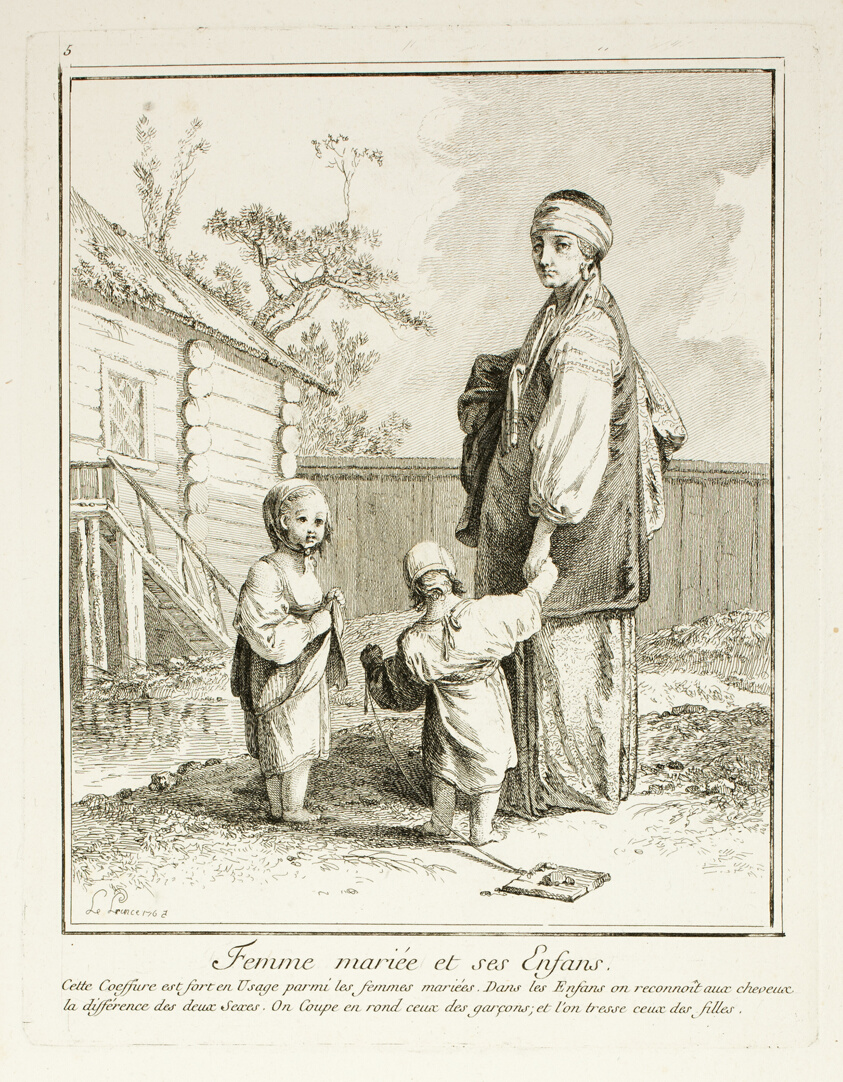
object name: Print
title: Married Woman and her Children, plate five from Divers Habillements des Peuples du Nord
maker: Jean-Baptiste Le Prince; French, 1734-1781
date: 1765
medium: Etching on paper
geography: France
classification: etching; print; prints and drawing